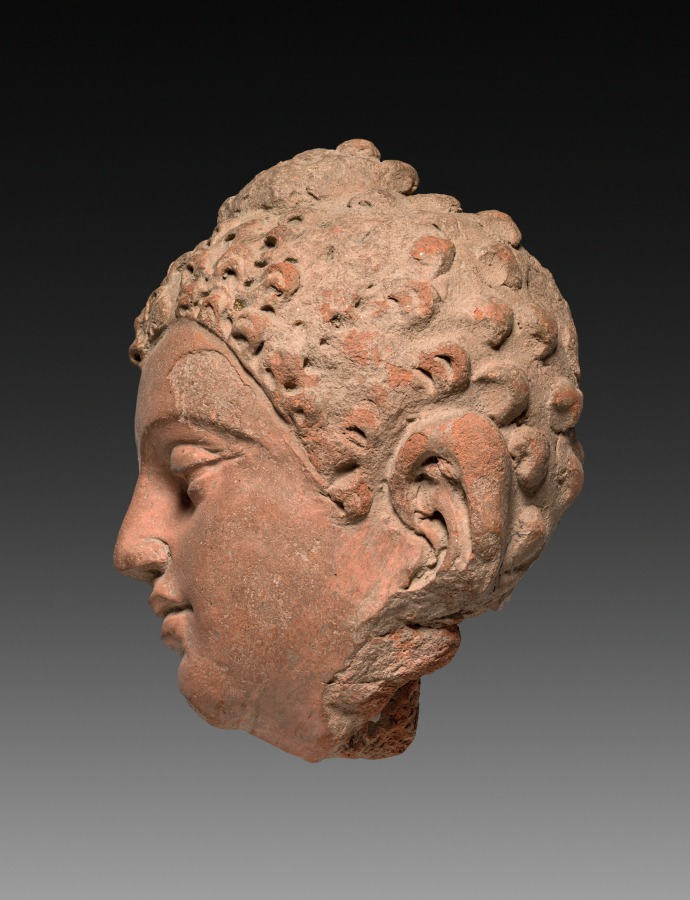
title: Head of Buddha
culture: India, Kashmir, Akhnur school, 8th century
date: 700s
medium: Clay, accidentally burned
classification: Sculpture